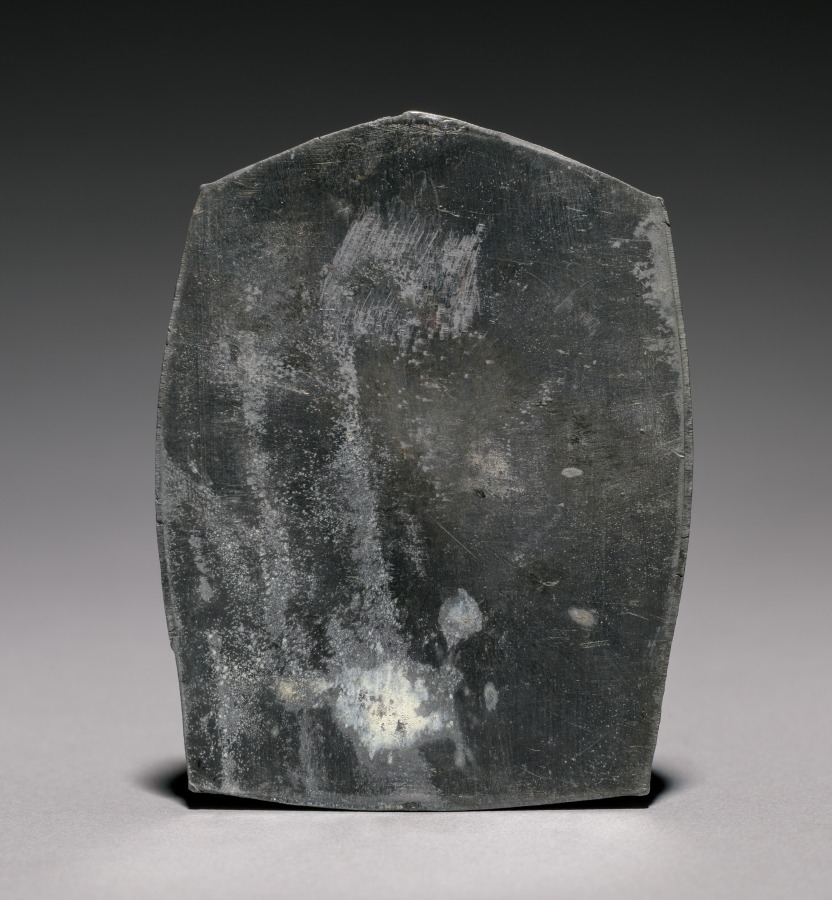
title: Lead Casting of Reverse Side of Peace and War Plaquette: War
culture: America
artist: Emil Fuchs (American, born Austria, 1866–1929)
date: 1913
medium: lead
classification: Metalwork